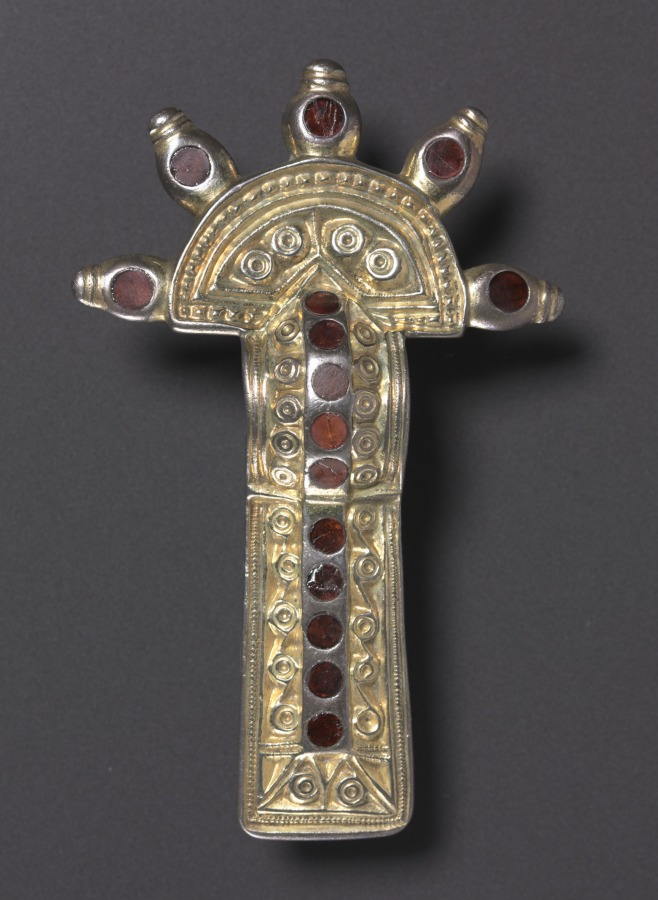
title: Bow Fibula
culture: Frankish, 6th century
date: 500s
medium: silver gilt with garnets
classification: Jewelry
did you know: A fibula is a type of brooch or pin, sometimes used for fastening clothes.